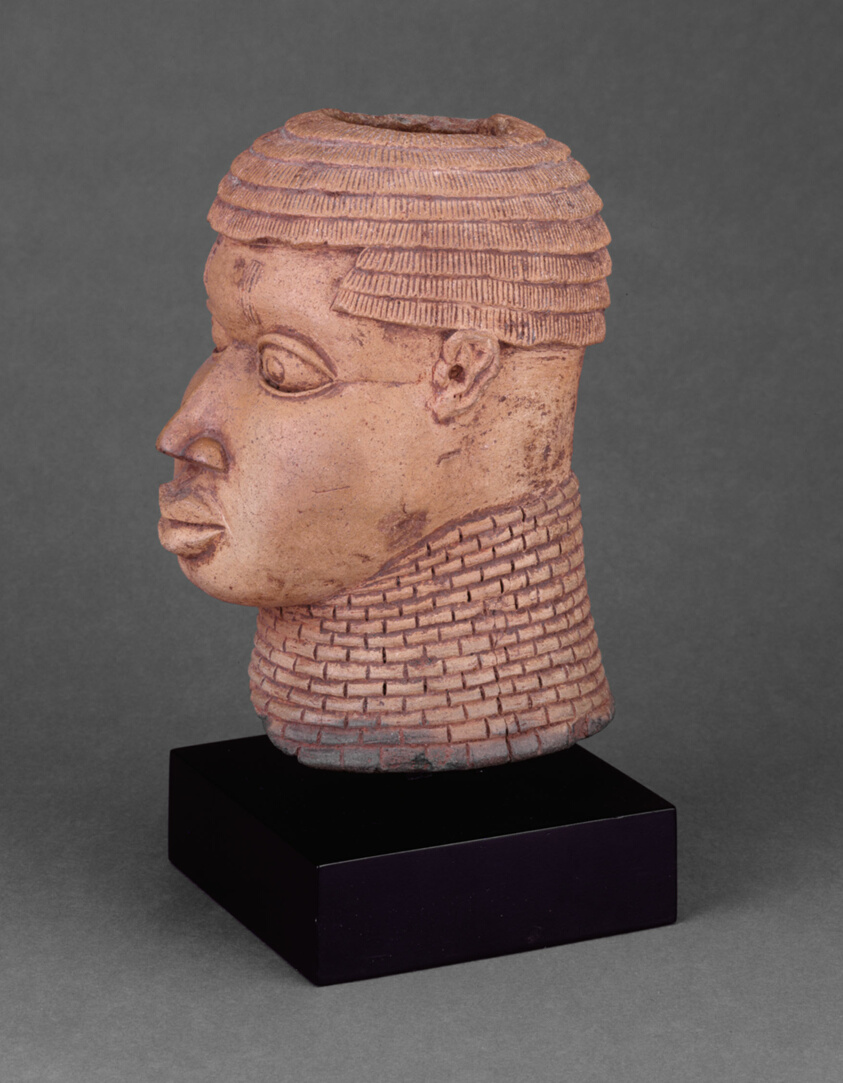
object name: Sculpture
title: Commemorative Head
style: edo (african), Arts of Africa, african Art, Coastal West Africa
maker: Edo, Court of Benin; Nigeria; Coastal West Africa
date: Probably mid–17th/mid–18th century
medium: Terracotta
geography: Nigeria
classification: earthenware; arts of Africa; ceramics; sculpture; african art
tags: head